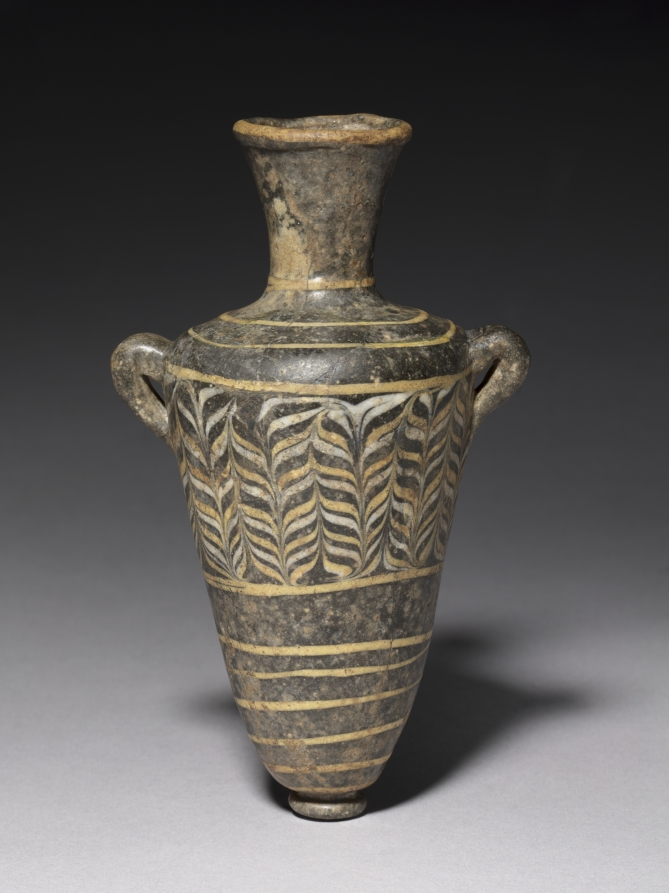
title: Unguent Bottle (Amphoriskos)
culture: Egypt, New Kingdom (1540–1069 BCE), Dynasties 18–19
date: 1549–1296 BCE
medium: glass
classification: Vessels